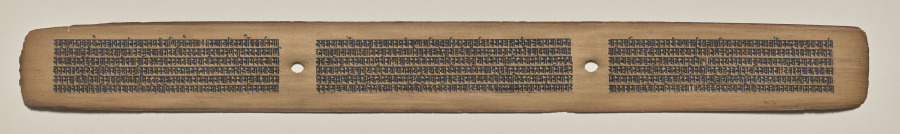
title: Text, Folio 35 (recto), from a Manuscript of the Perfection of Wisdom in Eight Thousand Lines (Ashtasahasrika Prajnaparamita-sutra)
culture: Eastern India, Bihar, Vikramashila Monastery. Painting: Nepal, Kathmandu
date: Sunday, September 14, 1119 (year 239 of the Newar Samvat in the month of Ashvina)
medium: gum tempera and ink on palm leaves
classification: Painting